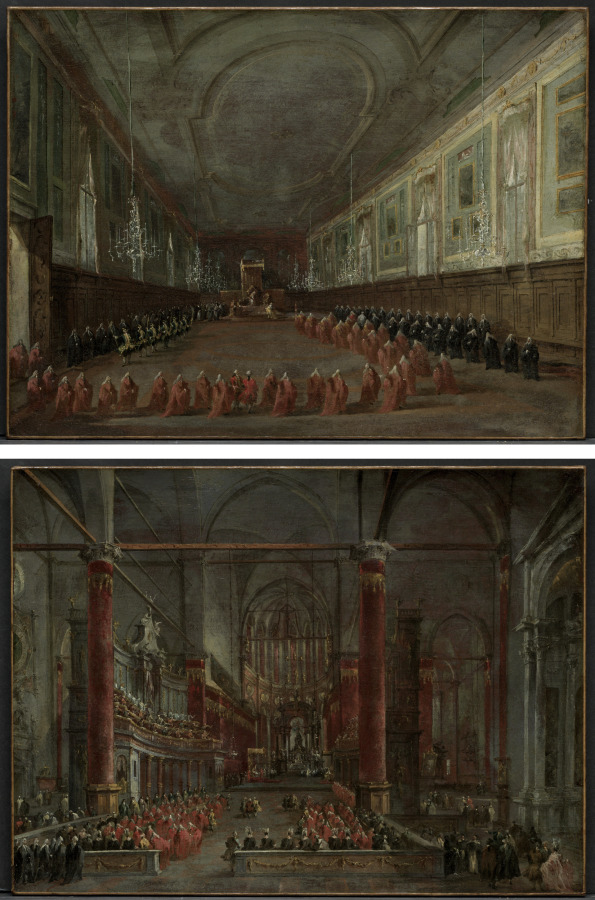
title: Pope Pius VI Descending the Throne to Take Leave of the Doge in the Hall of SS. Giovanni e Paolo, 1782 and Pontifical Ceremony in SS. Giovanni e Paolo, Venice, 1782 (pair)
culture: Italy, 18th century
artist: Francesco Guardi (Italian, 1712–1793)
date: c. 1783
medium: oil on canvas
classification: Painting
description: From May 15-18, 1782, Pope Pius VI Braschi was in Venice, the only papal visit during the eighteenth century, an event celebrated with great festivities. Francesco Guardi (1712-1793), a native Venetian, was one of the most celebrated scenic painters of the eighteenth century, and specialized in depictions of cityscapes and the pomp and pageantry of Venetian ceremonial life. To celebrate the momentous occasion, the Englishman Peter Edwards commissioned four large scenes of the Pope's visit. The museum's two smaller paintings represent copies of the popular subject, which Guardi copied either for the open market or for other patrons. The Pontifical Ceremony (Te Deum) depicts the musical performance of Te Deum, a prayer of thanksgiving set to music by Antonio Vivaldi (1678-1741), a famous Venetian Baroque composer. Te Deum was a traditional hymn recited in thanks to God for a special blessing, including a papal election or a royal coronation, and was appropriate for the historic papal visit. In the Reception of the Doge and Senate, the Doge, the elected prince of Venice, and Senators of the Venetian Republic process towards the throne, as the pope blesses the multitude of government leaders.